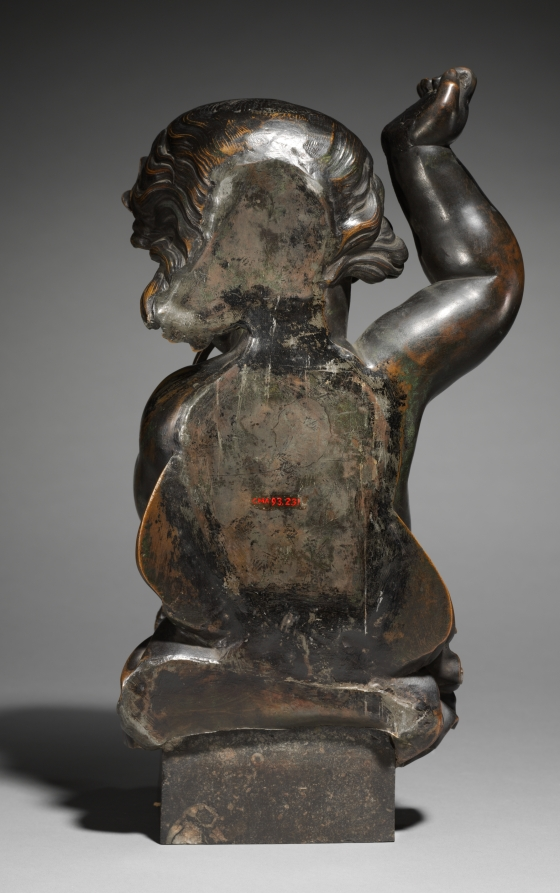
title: Autumn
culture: France, 19th century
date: 1800s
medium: bronze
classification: Sculpture